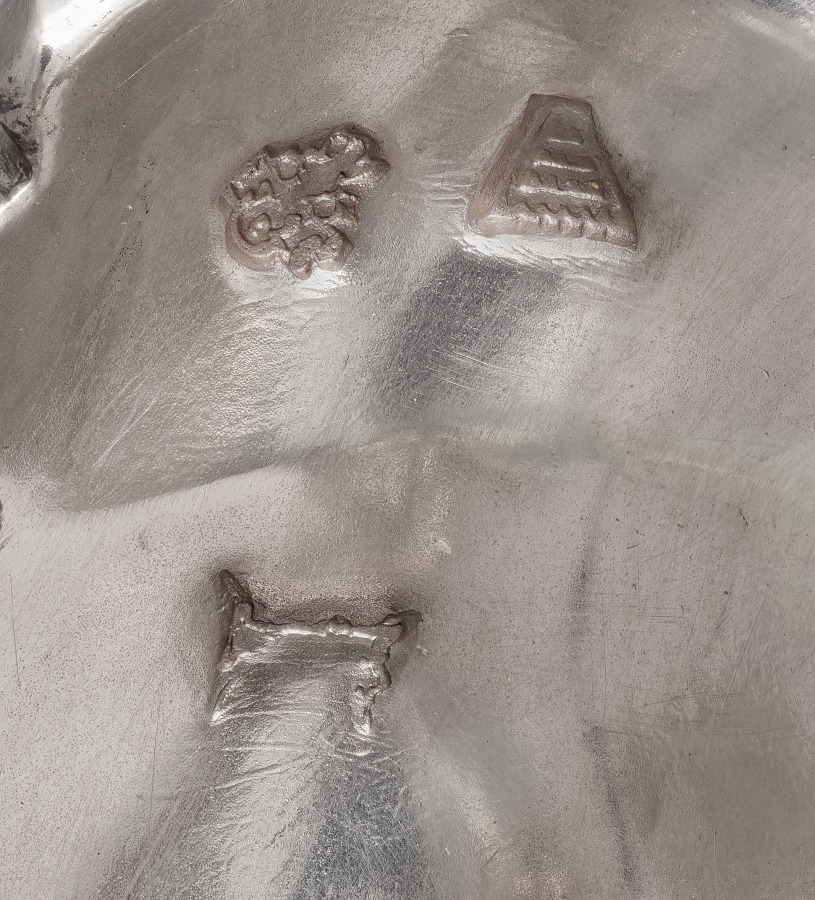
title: Candelabrum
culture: France, Paris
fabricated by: François Thomas Germain (French, 1726–1791)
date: 1757–58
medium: silver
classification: Silver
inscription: [Charge mark of Eloy Brichard , 1756−1762, beneath base]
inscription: [Warden's mark for Paris, 1757-1758, beneath base]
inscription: [Discharge mark for work intended for export, 1756−1775, on base]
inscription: [Hallmarks for Saint Petersburg, on base]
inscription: [Assayer mark of Ivan Frolov, on base]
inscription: [Russian standard of the French silver, on base]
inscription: [Maker’s mark of Francois-Thomas Germain, master silversmith on October 16, 1748, beneath drip pan one each of three bobeches]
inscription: [Charge mark Of Eloy Brichard, 1756−1762, beneath drip pan one each of three bobeches]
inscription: [Discharge mark for work intended for export, 1733 (?)−1775, beneath drip pan one each of three bobeches]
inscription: [Warden's mark for Paris, 1757−1758, beneath drip pan one each of three bobeches]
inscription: [Assayer mark of Ivan Frolov, beneath drip pan of one of three bobeches]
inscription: [Russian standard of French silver, beneath drip pan of one of three bobeches]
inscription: [Charge mark for large work of Eloy Brichard, 1756−1762, on candelabra bayonet attachment]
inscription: [Discharge mark for work intended for export, on candelabra bayonet attachment]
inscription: [Beneath base]: “Fait. Par. F. T. Germain. Sculp[teu]r. Orf[ev]re. Du Roy. Aux. Galleries. Du Louvre. A Paris. 1758”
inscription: [Beneath base]: "Du no.32"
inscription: [Beneath base]: "No 465"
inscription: [Engraved Russian Imperial coat-of-arms, beneath base]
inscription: [Modern inscription in a round paper label, beneath base]: “[?]8” [printed in black]: “3120” [written in pencil]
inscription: [Modern inscription in a rectangular paper label, beneath base]: “…IN/FRANCE” [printed in black]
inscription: [Modern inscription in a rectangular paper label, beneath base]: “46” [written in black ink]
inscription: [Engraved cipher composed with two “M”’s (?) surmounted by a royal crown, on base]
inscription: [Engraved, on base]: "No 465"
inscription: [Engraved, on base]: "du No 32"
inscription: [Engraved cipher composed with two “M”’s (?) surmounted by a royal crown, on one bobeche]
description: This candelabrum is part of a pair. Its design blurs the line between function and decoration. The arms twist and curve, appearing as flower stems while physically supporting the candles. Though this visual unity is typical of the Rococo style, the influence of the rising neoclassical style is evident in the allegorical scenes of light that decorate each candelabra’s stem.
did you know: These candelabra are part of a dinner service sent from Paris, France, to Saint Petersburg, Russia, in two separate shipments, the first of which contained 270 objects for 8 dozen place settings.